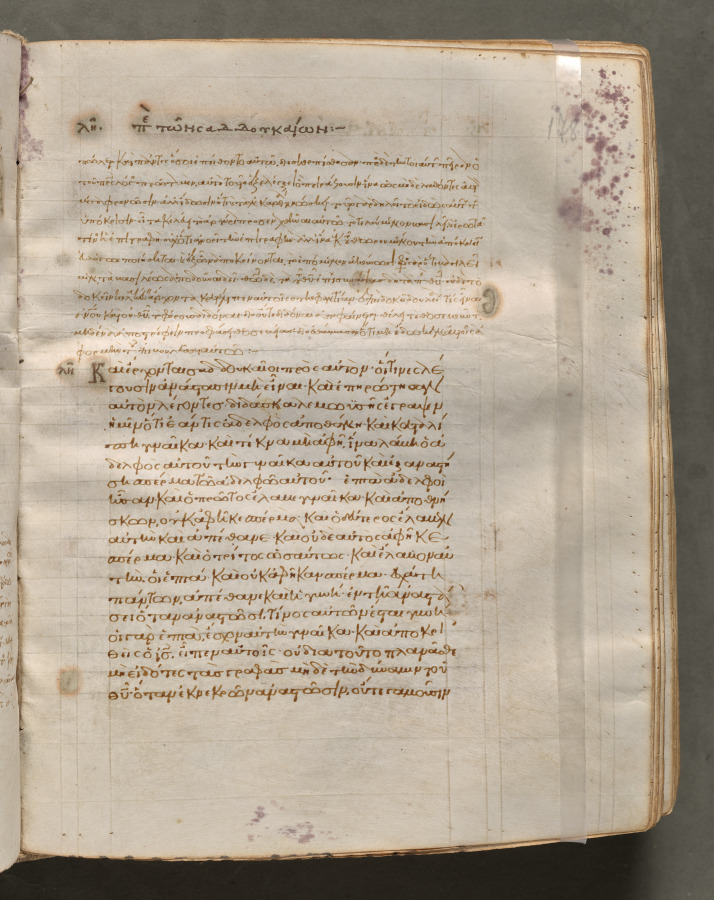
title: Text, folio 178 (recto), from a Gospel Book with Commentaries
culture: Byzantium, Constantinople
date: c. 1000–1100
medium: ink, tempera, and gold on vellum; leather binding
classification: Bound Volume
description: Each of the four gospels in this book opens on a page with brilliantly illuminated borders depicting the author of the text as well as birds-principally peacocks, symbols of the immortality of the soul-and fountains, representing the fountain of life and the salvation of the soul. This volume consists of 428 leaves with texts in Greek. Its level of sophistication suggests that it was probably written and decorated in a monastery in Constantinople.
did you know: Gospel Books were carried in procession through Byzantine churches.